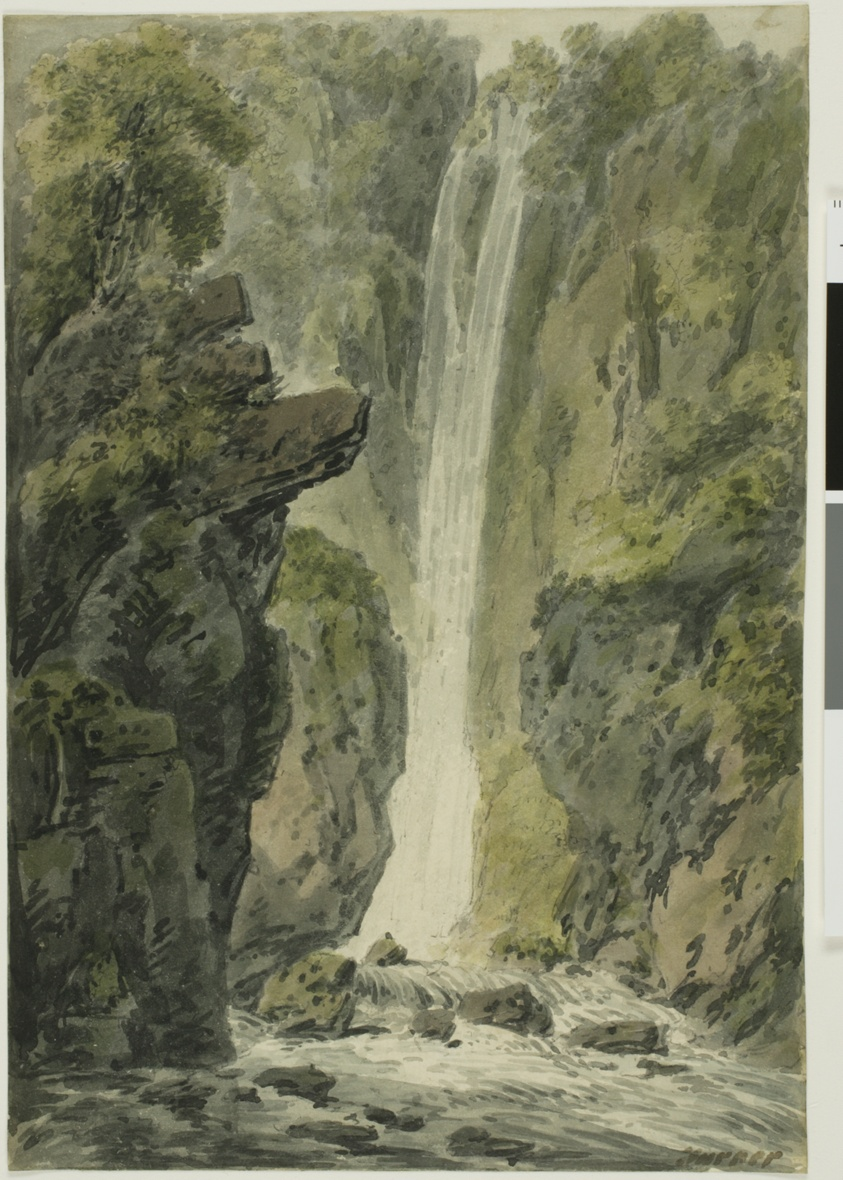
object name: Drawing and Watercolor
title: Waterfall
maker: Attributed to Edward Dayes (English, 1763-1804); or Joseph Mallord William Turner (English, 1775-1851)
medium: Watercolor over graphite on cream wove paper, laid down on board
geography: England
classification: watercolor; drawings (visual works); prints and drawing